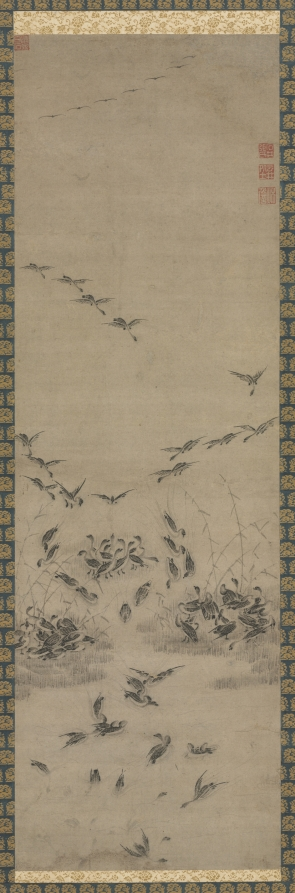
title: Geese Returning Home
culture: Korea, Joseon dynasty (1392–1910)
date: 1600s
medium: hanging scroll; ink on paper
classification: Painting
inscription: three seals in upper right; one in upper left corner.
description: In this hanging scroll, wild geese are portrayed engaging in different activities: descending to a marsh, gathering in flocks, grazing on plants, and dipping their heads under the water. In Korean paintings, images of geese serve as the symbol of seasonal change because they migrate from northern areas such as Siberia to stay in the Korean Peninsula during the late fall and winter.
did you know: In Korea, the word for geese in a grove of reeds, noan, has the same pronunciation as the word for "the comfortable life at old age." With this double meaning for a happy life, the motif of returning geese gained popularity in paintings.